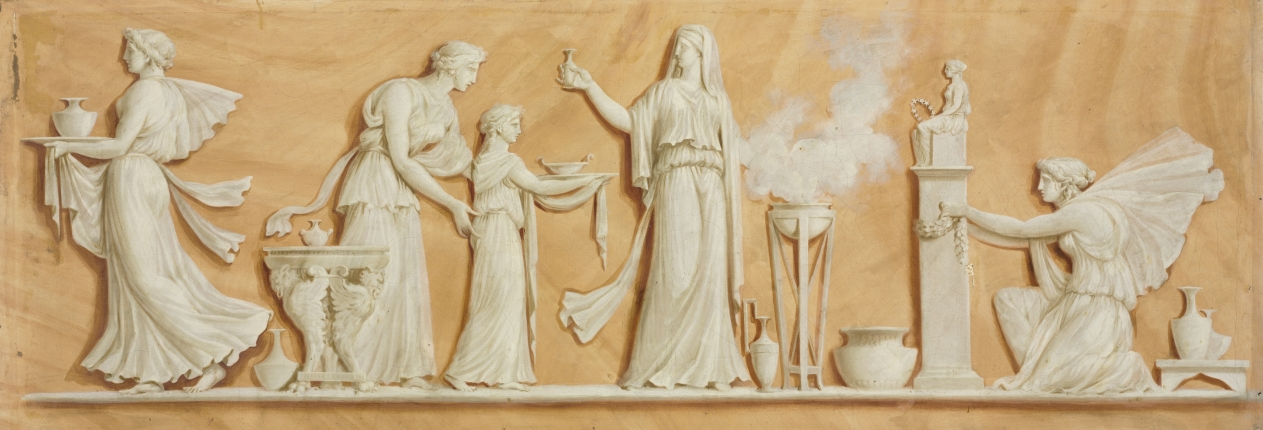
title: Overdoor Painting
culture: France, 18th century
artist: Pierre Rousseau (French, 1751–1829)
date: 1790s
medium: oil on canvas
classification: Painting